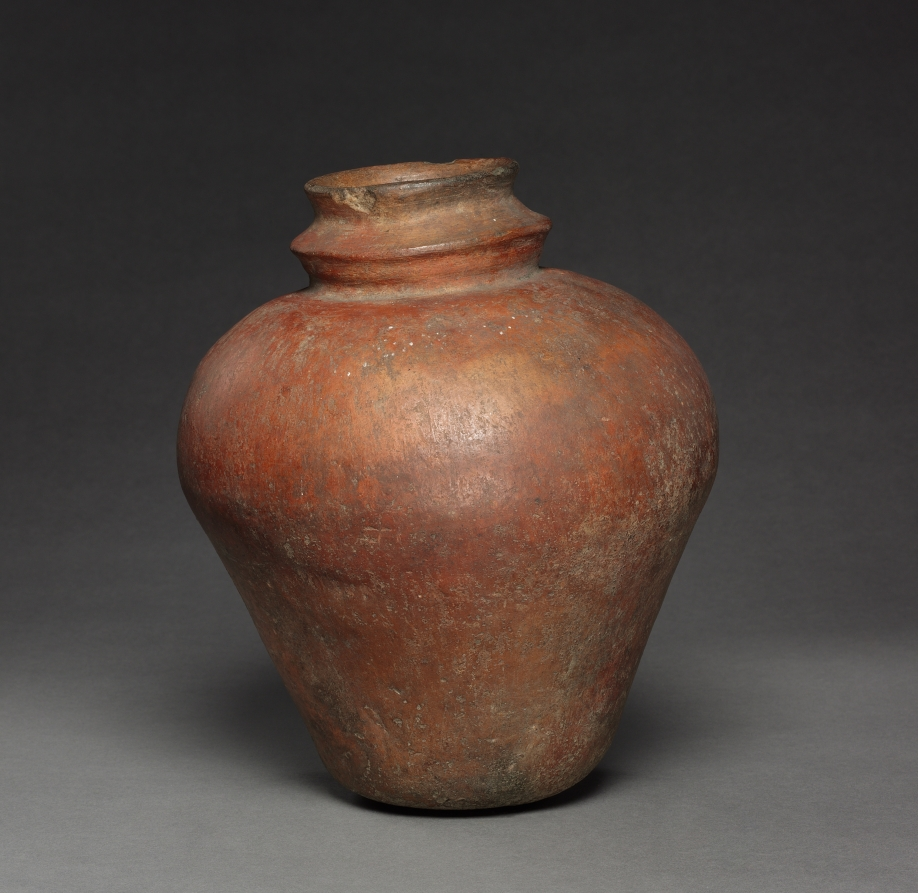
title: Vase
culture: Colombia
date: before 1921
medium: pottery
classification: Ceramic